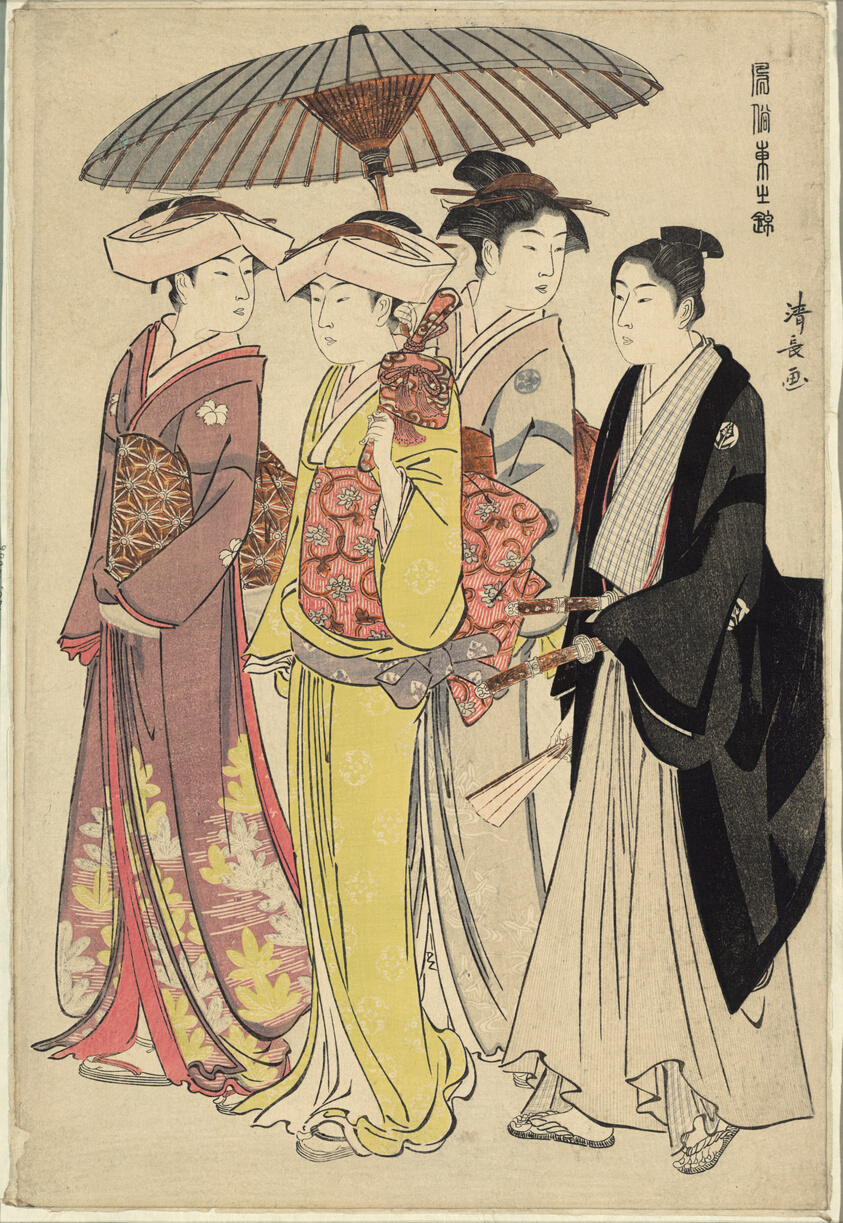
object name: Print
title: A Lady with Three Servants, from the series "A Brocade of Eastern Manners (Fuzoku Azuma no nishiki)"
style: Japanese (culture or style)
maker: Torii Kiyonaga (Japanese, 1752-1815)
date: c. 1783/84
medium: Color woodblock print; oban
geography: Japan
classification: woodblock print; print; asian art